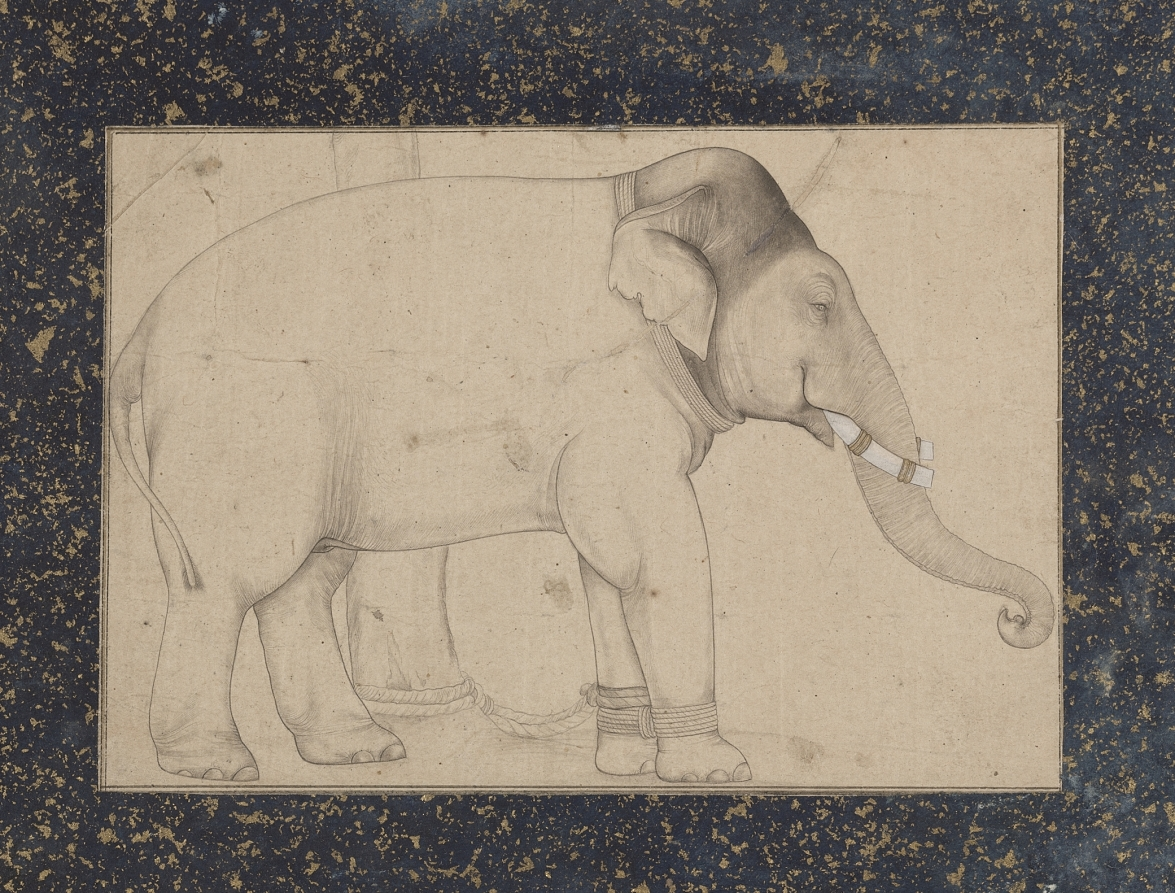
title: Drawing of an Elephant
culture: India, Mughal School, early 18th Century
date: c. 1700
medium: ink on paper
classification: Painting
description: Beginning with Babur, but especially with Akbar, the Mughal emperors displayed an enormous interest in and affection for the elephants of India. The palace housed many elephants, used by the royal court for practical tasks such as carrying heavy loads through rivers and over difficult ground, for charging into battle, and, sometimes, for executing captives. They were also used for entertainment purposes such as riding, ceremonial processions, hunting, and fighting. Royal elephants were cared for by trained staff and kept on a special diet. Their tusks, necks, and ankles were often decorated with golden chains and hoops encrusted with jewels and pearls.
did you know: Domesticated elephants had their tusks trimmed and decorated with gold rings.